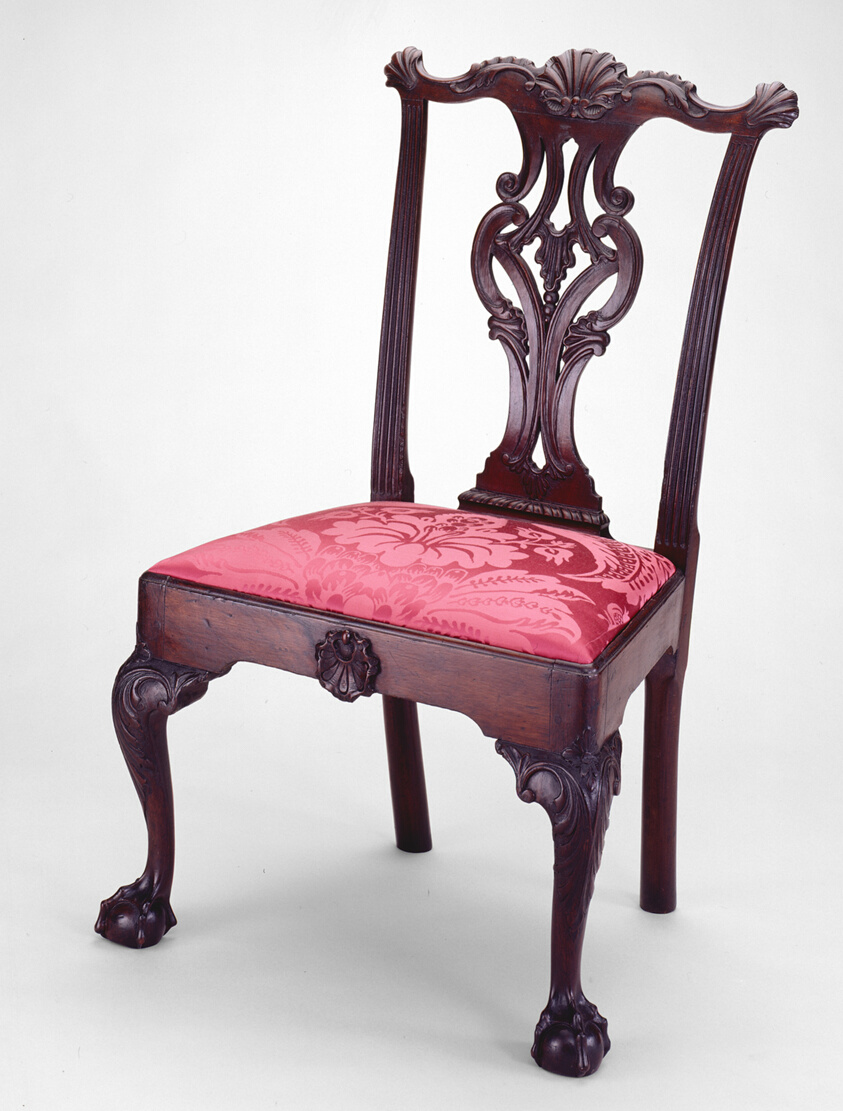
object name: Furniture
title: Side Chair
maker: Artist unknown (American, 18th century); Philadelphia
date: 1750–55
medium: Mahogany with tulip poplar and upholstery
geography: Philadelphia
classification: seating; furniture; american decorative arts; american arts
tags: furniture